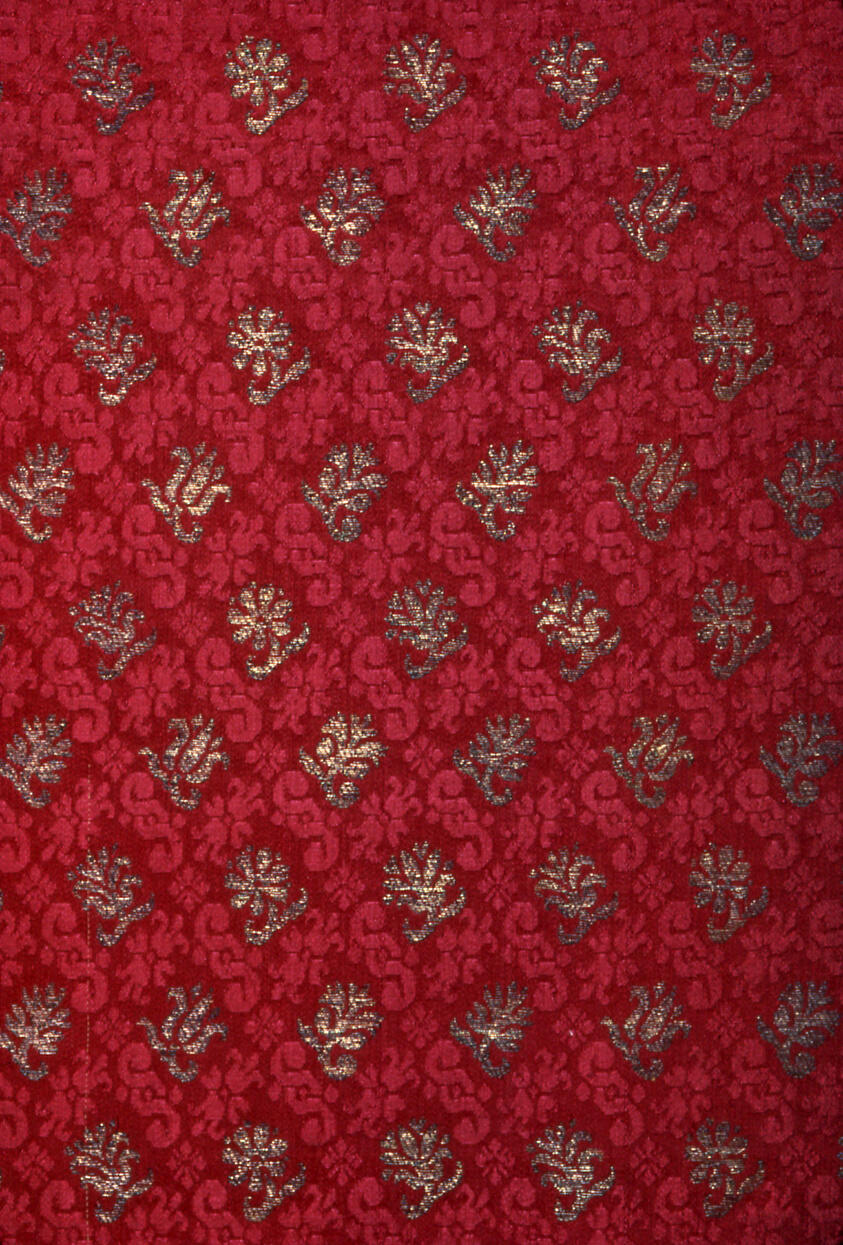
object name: Textile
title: Panel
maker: Italy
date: 1625/75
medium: Silk and gold gilt strip wound around a silk fiber core, satin weave with supplementary brocading wefts and self-patterned by reversing of faces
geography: Italy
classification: textile; weaving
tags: lattices, flowers